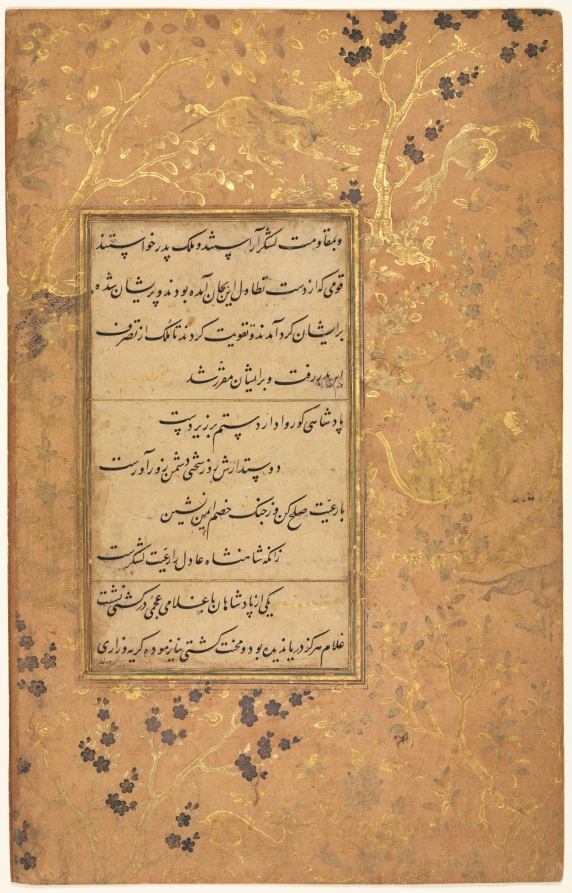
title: Illuminated folio from a Gulistan (Rose Garden) of Sa'di (c. 1213–1291)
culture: Iran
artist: Sultan 'Ali al-Mashadi (Iranian, 1430–1520)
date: about 1475–1500; border: about 1550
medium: Gum tempera, ink, gold, and silver on paper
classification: Manuscript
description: In the border surrounding the Persian poetical text, deer and a lion coexist peacefully in a forest. This imagery may reference the rule of a righteous king. The text is from the Gulistan, one of the most celebrated works of Persian literature, completed around 1258. Gulistan means “Rose Garden” in Persian; just as a rose garden is a collection of flowers, the contents are a collection of anecdotes. This page is from the section “On the Conduct of Kings.”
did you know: The silver blooms and streams of water have tarnished and darkened over time.